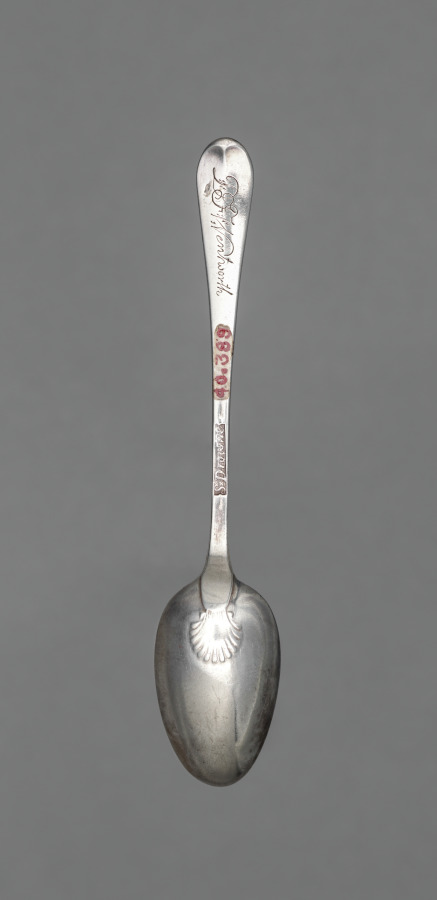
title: Teaspoon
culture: America, New Hampshire, Portsmouth, 18th century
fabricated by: Samuel II Drowne (American, 1749–1815)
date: c. 1770–1780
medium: silver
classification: Silver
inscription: engraved "M+F" in block letters on top of handle end, and "D.F.Wentworth" (later) in script on back of handle end.